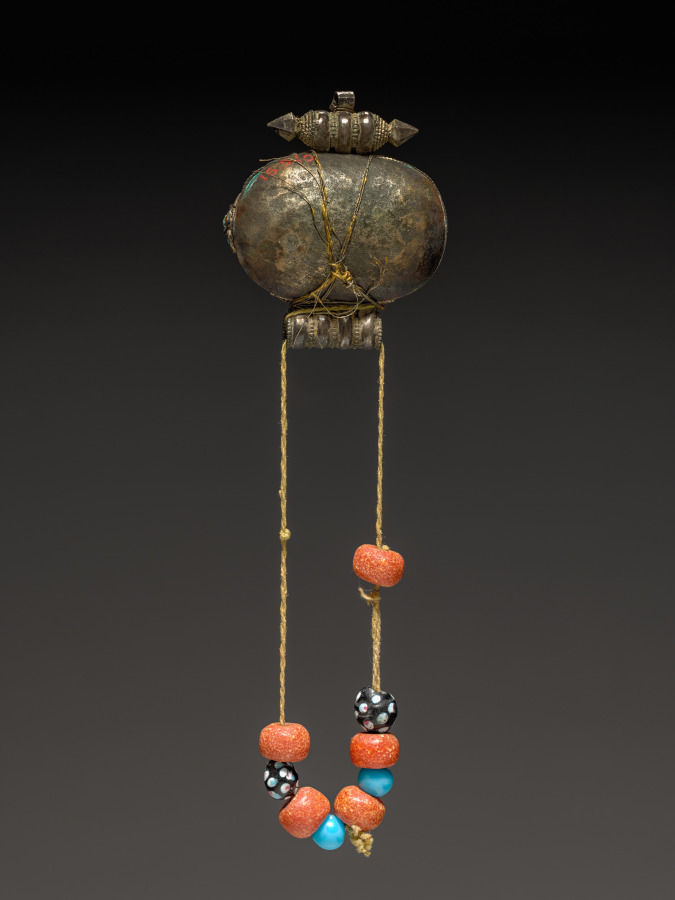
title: Amulet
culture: Tibet(?)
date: 1800s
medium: silver with turquoise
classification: Jewelry